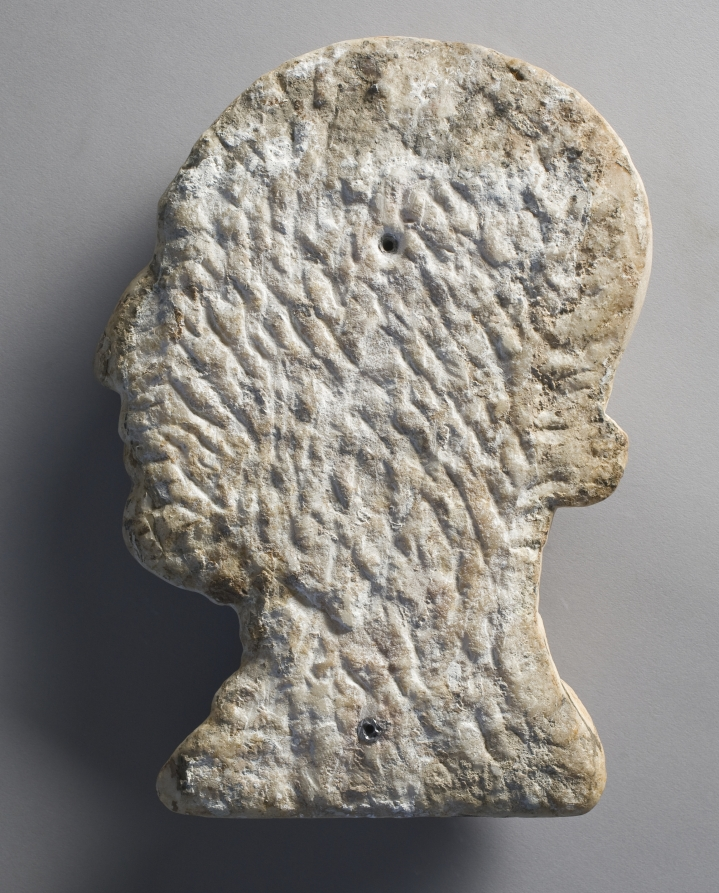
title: Portrait of Francesco Sforza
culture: Italy, Lombardy, 15th century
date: 1450–1499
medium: marble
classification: Sculpture